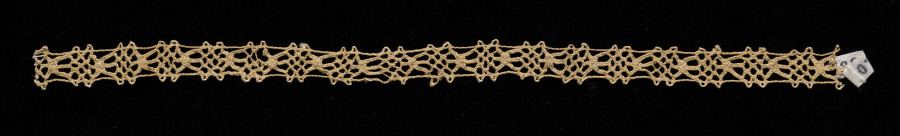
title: Lace Insertion (with selvage)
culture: Italy, Venice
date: 1540–60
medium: Bobbin lace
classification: Lace